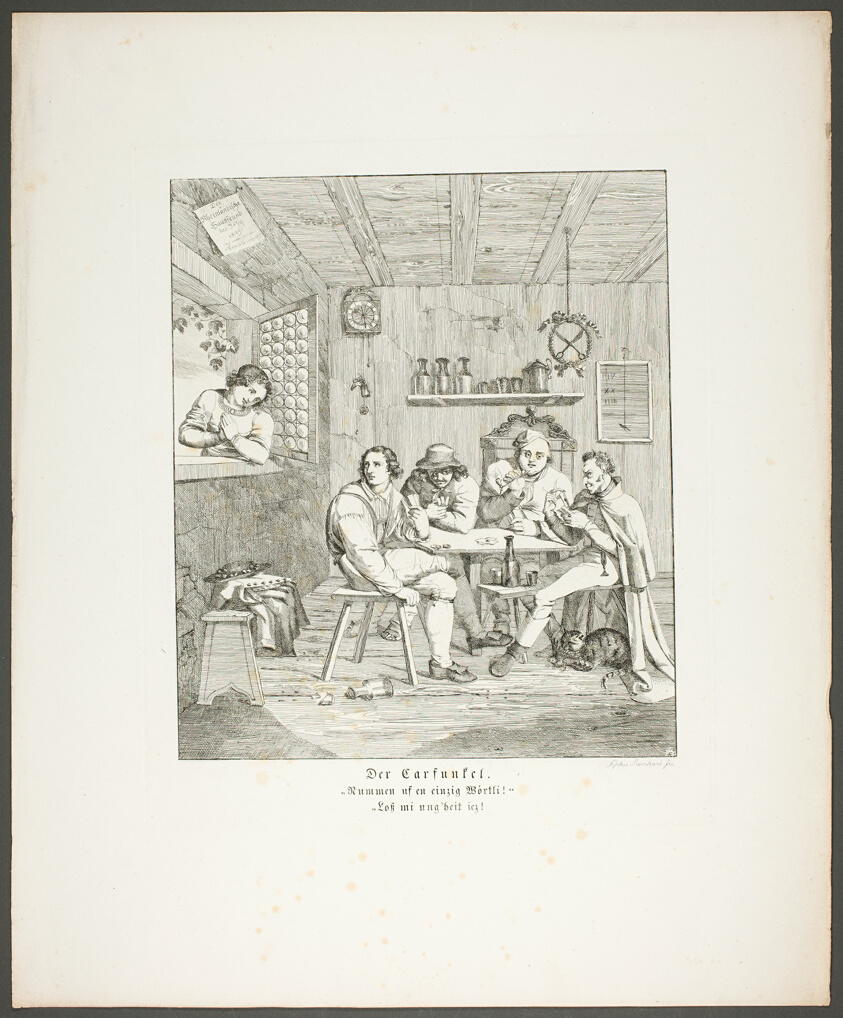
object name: Print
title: The Carbuncle (Der Karfunkle), plate two from the series Poems in the Dialect of the Upper Rhine Region (Zehn Blätter Zu Hebels Alemannischen Gedichten)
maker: Sophie Reinhard (German, 1777-1843); published by Mohr und Winter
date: 1820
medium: Etching on cream wove paper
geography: Germany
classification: etching; print; prints and drawing